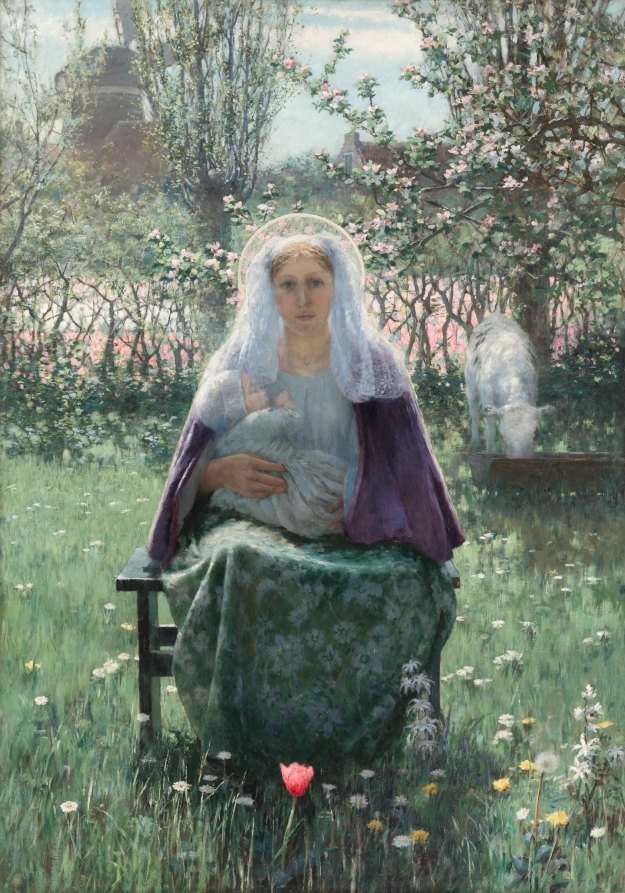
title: The Blessed Mother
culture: America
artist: George Hitchcock (American, 1850–1913)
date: 1892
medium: oil on canvas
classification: Painting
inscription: signed lower right: -G- HITCHCOCK- / -1-8-9-2-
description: George Hitchcock decided to study art in Paris after practicing law for five years. He eventually settled in Holland and painted this Dutch peasant mother holding her baby and posing formally in a garden. Hitchcock was a visionary painter fascinated by the power of faith. But, like with many of his paintings, both the title and the scene here remain ambiguous, being neither clearly religious nor clearly secular. Early critics praised the work for its technical sophistication and representation of maternal tenderness, but they questioned its religious merit. Other reviewers, however, recognized religious symbolism throughout the painting. The mother's lacy headdress can represent a halo. The apple tree suggests the lost Eden, recovered through the birth of the child. The young bullock hints to the future sacrifice of Christ, and the prominent red tulip at the feet of the figures symbolizes the cup of sorrow. This painting's religious ambiguity exemplifies the 19th-century struggle to bring faith to terms with technical, philosophical, and scientific advances, namely Darwinism. Left to search for meaning in life and a spiritual identity, many artists, like Hitchcock, looked to women and nature for a link to the divine.